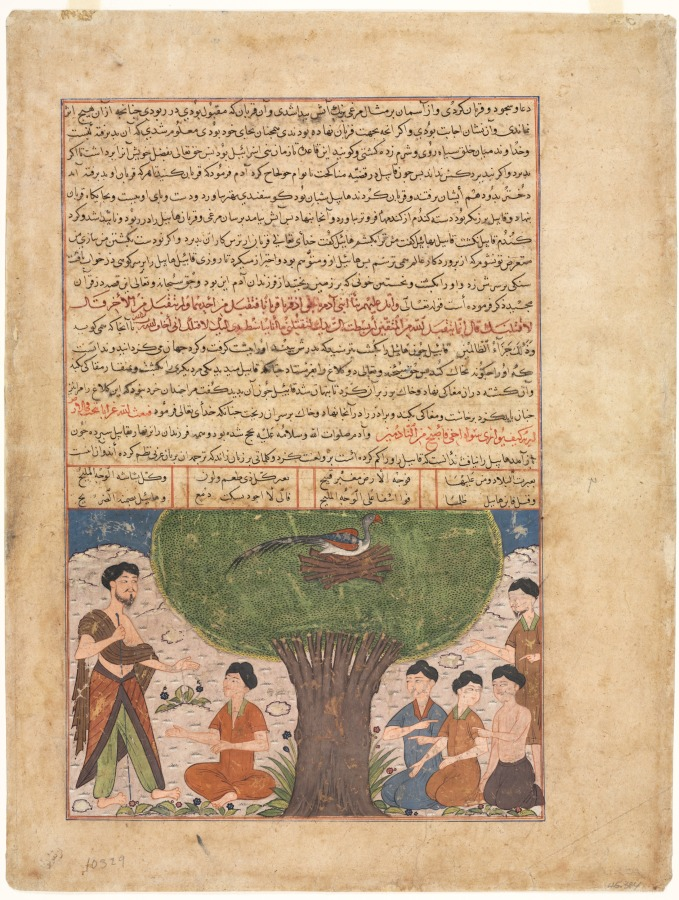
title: Text Page, Persian Prose (recto); The Story of Adam peace upon him, his Sons and Progeny (verso)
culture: Afghanistan, Herat, Timurid period (1370–1501)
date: c. 1425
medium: ink and opaque watercolor on paper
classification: Manuscript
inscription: script: Naskh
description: These two pages are from a manuscript that evidently was written and illustrated for the library (at Herat) of the Timurid king Shah Rukh, the son of Timur (Tamerlane). The Majma' al-Tawarikh traced the history of the world, beginning with the prophets of the Old Testament until the reign of Shah Rukh.